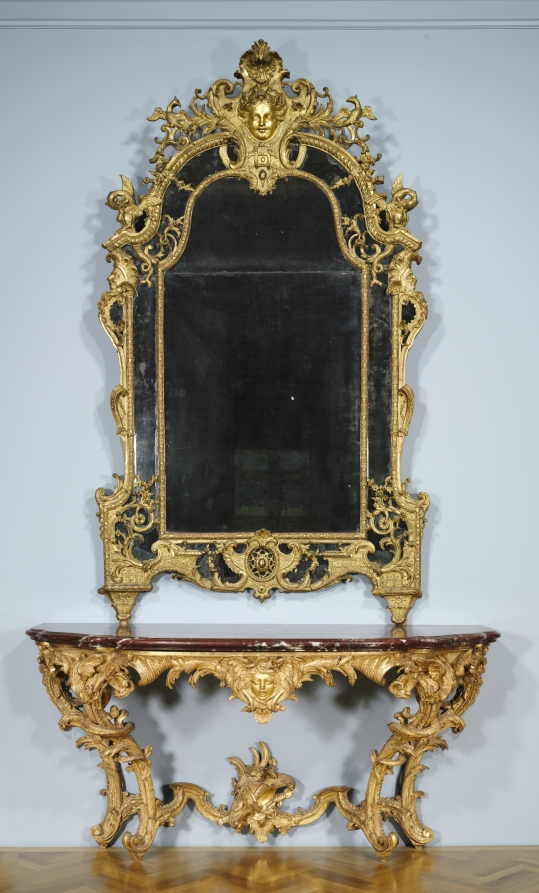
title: Wall Mirror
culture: France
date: c. 1720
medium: carved and gilded wood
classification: Furniture and woodwork